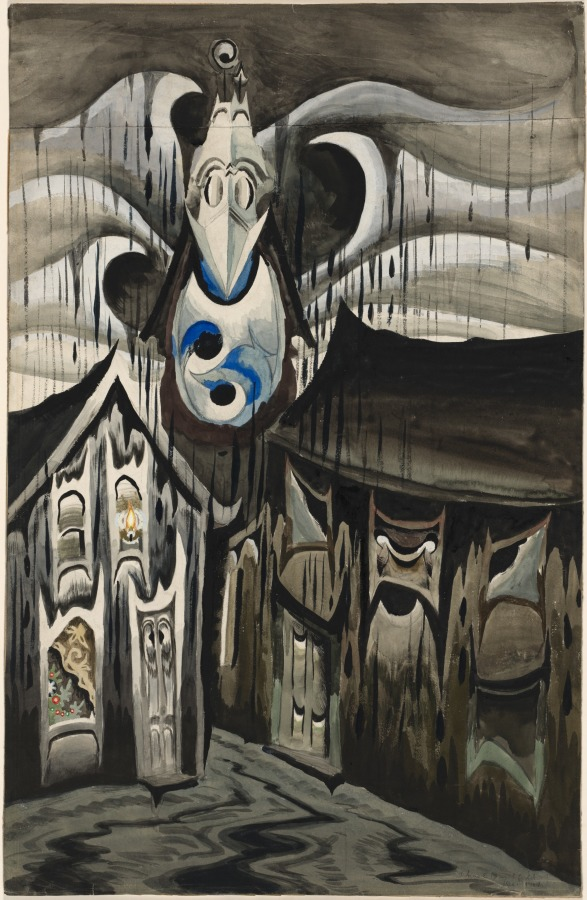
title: Church Bells Ringing, Rainy Winter Night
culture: America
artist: Charles Burchfield (American, 1893–1967)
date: December 1917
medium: watercolor and gouache over graphite on wove paper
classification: Drawing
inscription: signed, at lower right, in graphite: Chas E Burchfield / Dec. 1917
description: Burchfield considered this drawing among the greatest accomplishments of his “golden year.” This period followed a time of self-doubt and uncertainty: after graduating from the Cleveland School of Art, Burchfield enrolled in the National Academy of Design in New York City, but dropped out after one day, returning to Salem to work an office job. He painted inexhaustibly during his breaks and at night, depicting Salem and its environs in an increasingly abstract style. Church Bells Ringing, Rainy Winter Night shows the spire of Salem’s Baptist church rising up between two houses. Burchfield hoped to express his powerful childhood fear of the bell’s ominous ring—which he described as “a dull roar . . . dying slowly & with a growl.” Hearing it on stormy winter nights, he huddled in his bed and calmed himself by thinking of Christmas, a practice suggested by the tree visible through a window in the drawing. Burchfield carefully refined the composition throughout the sketches seen in this gallery. The drawing’s mood is conveyed through gray tones and the buildings’ hulking forms. Burchfield also created a complex language of symbols entitled “Conventions for Abstract Thoughts,” that recurred throughout his work and represented universal emotions. The hooked forms surrounding the tower stood for “Fear,” for example, and the shapes of the houses’ doors and windows symbolize “Morbidness” and “Evil.” Developed fully in this drawing, these symbols dominated Burchfield’s work during the remaining several years he spent in Ohio.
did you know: Salem's Baptist Church, a central feature of Burchfield's composition, has since been destroyed by fire.